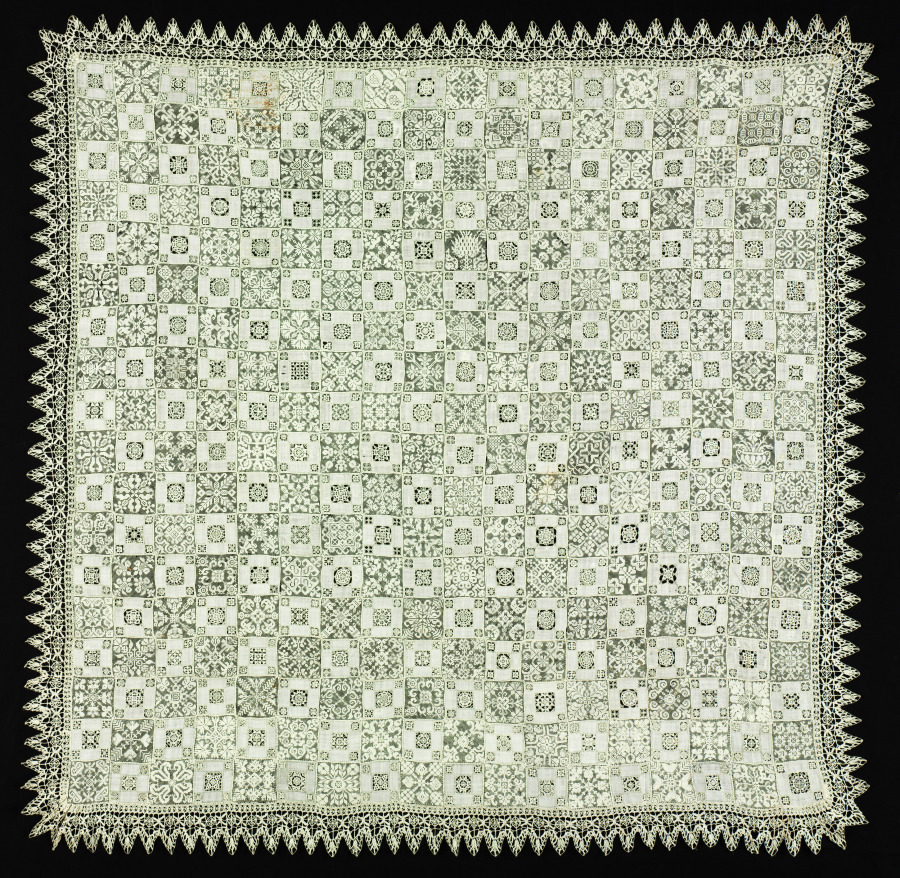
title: Cloth with Floral and Vegetal Patterns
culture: Italy, late 1500s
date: 1560–1600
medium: Bleached linen (est.): needle lace, filet/lacis (knotted ground and darned in two directions), alternating reticella squares (open cutwork), and bobbin lace edging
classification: Lace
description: Textiles often incorporate multiple needlework techniques within a single piece. One of the main techniques in this example of lace is called cutwork. In cutwork, portions of the textile ground, such as a linen or cotton cloth, are cut away and threads are removed to create holes. The edges of the hole are then reinforced with embroidery and a pattern of needle lace can be created within the perimeter. Rather than adding to the cloth to create a design, the craftsperson removes threads to fabricate a pattern.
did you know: The large size and square shape suggest that this textile would likely have been used as a table cloth.